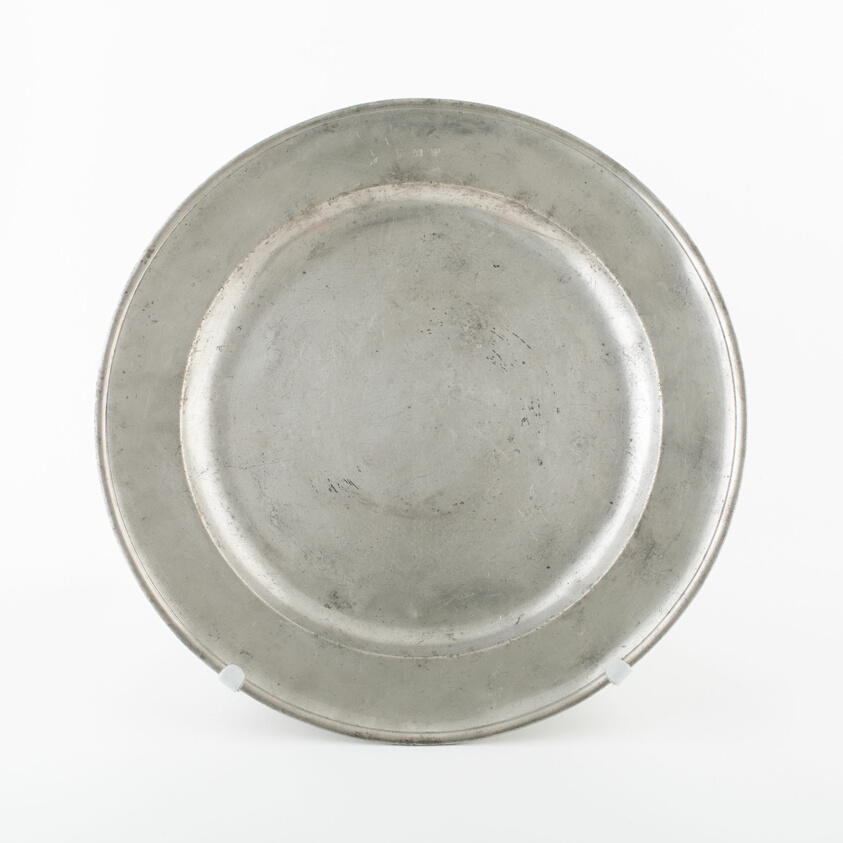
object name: Metalwork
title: Charger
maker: Thomas Shakle; English, active 1680-1695; London, England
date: 1680/95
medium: Pewter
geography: London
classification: metalwork; american decorative arts; american arts